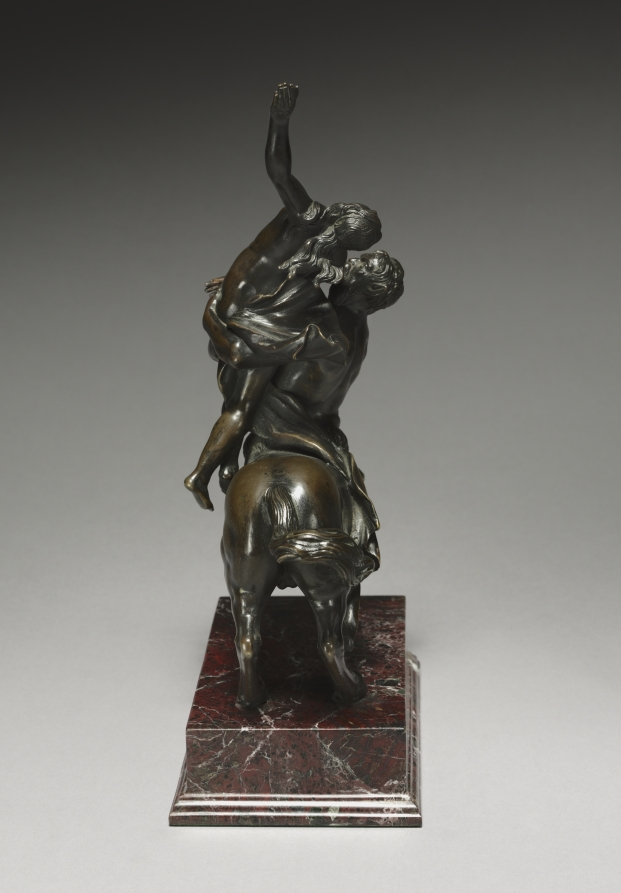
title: Nessus and Deianeira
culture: Italy, 17th century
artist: Francesco Fanelli (Italian, 1661)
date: made in England, probably 1630–40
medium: bronze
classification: Sculpture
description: Fanelli apparently came from Florence and this group clearly indicates that he was familiar with the work of Giambologna, the leading sculptor active in that city around 1600.